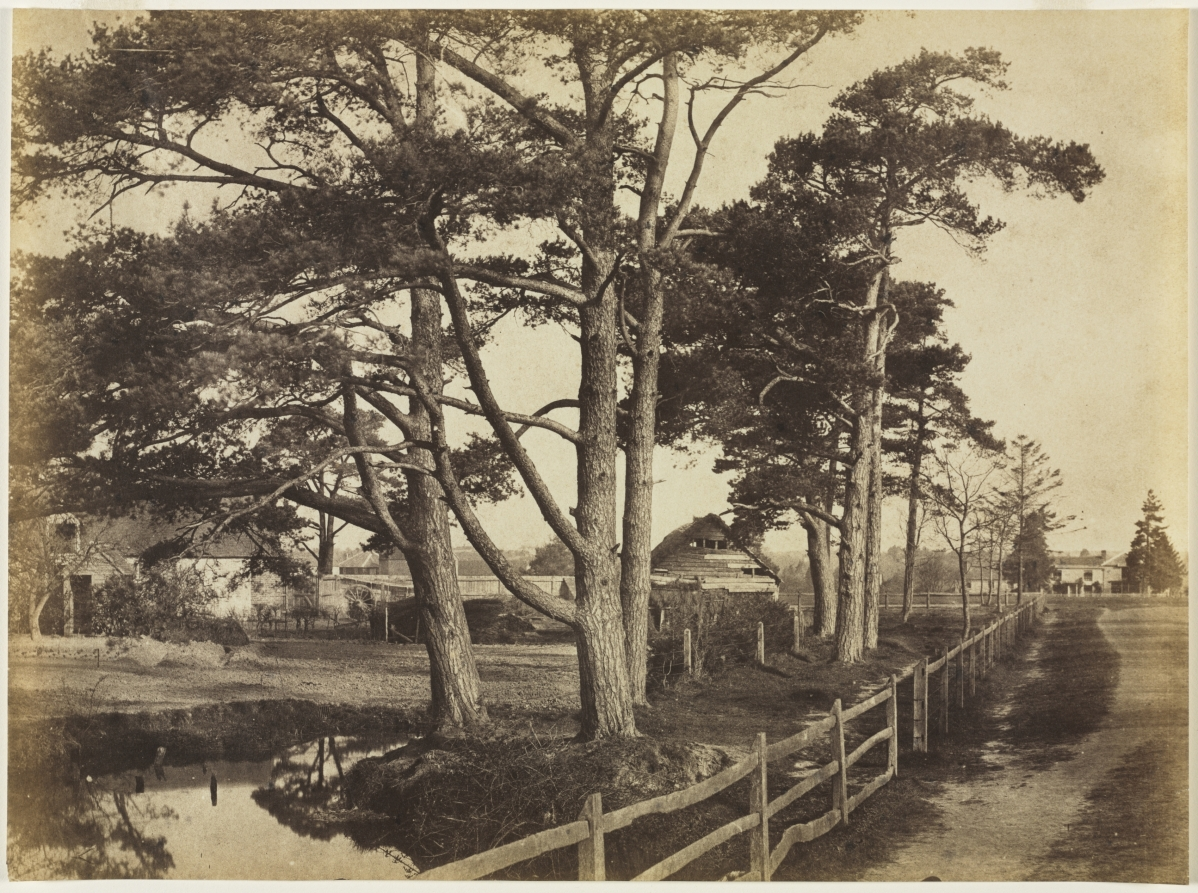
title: Scotch Firs, Hawkhurst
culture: England, 19th century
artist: Benjamin Brecknell Turner (British, 1815–1894)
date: 1853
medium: albumen print from calotype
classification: Photograph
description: Despite the Industrial Revolution, Benjamin Brecknell Turner portrayed the English countryside as stable, harmonious, and unchanging—a place where nature and humanity coexist in complete harmony. Here the artist captured a pastoral scene in Surrey, combining towering trees, houses, and farm buildings to create a skillful blend of rustic domesticity and charming landscape. Preferring to photograph at an angle, Turner's composition is enlivened by the strong diagonals found in the receding lines of trees, fence, and pathway, which lead the viewer in an orderly progression from foreground to background. According to family tradition, Scotch Firs, Hawkhurst was so admired by Queen Victoria's husband Prince Albert that Turner presented him with a print of the photograph in 1853.